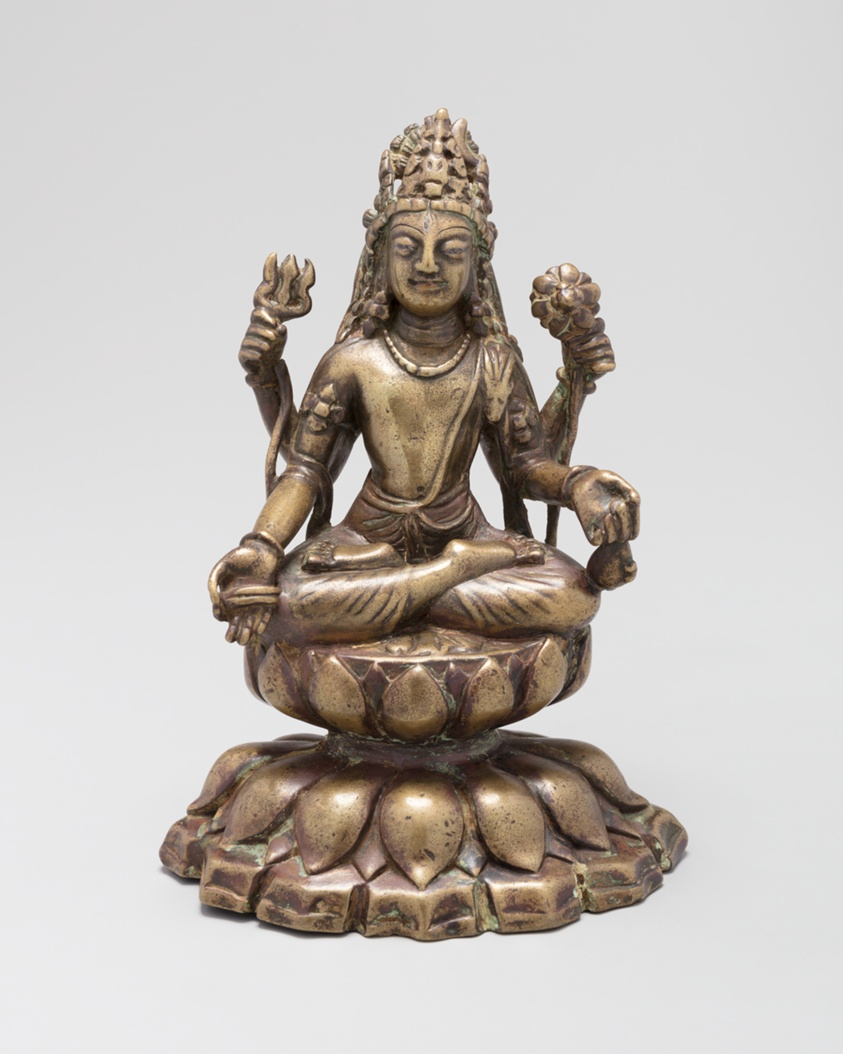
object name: Sculpture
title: Four-Armed Bodhisattva Avalokiteshvara Seated in Lotus Position (Padmasana)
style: South Asian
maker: Pakistan; Khyber Pakhtunkhwa Province, Swat Valley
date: 8th/9th century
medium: Brass inlaid with silver and copper alloy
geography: Pakistan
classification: sculpture; brass; metal; asian art